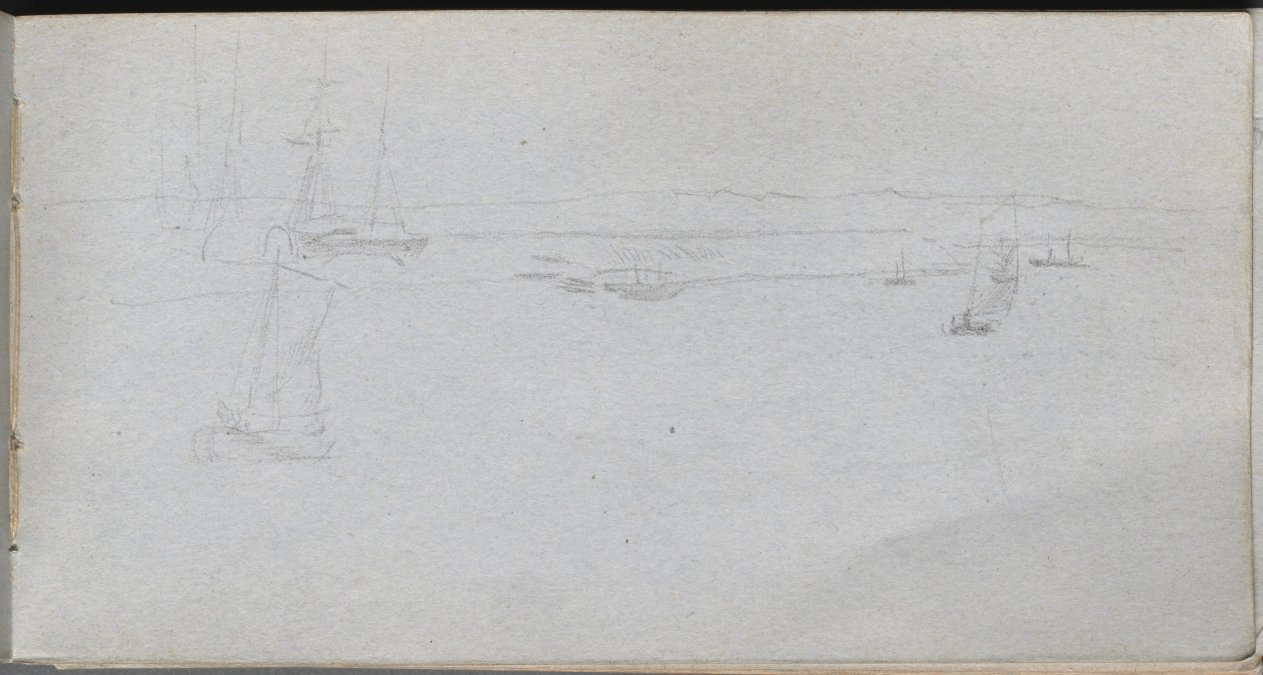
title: Sketchbook, page 94: Seascape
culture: France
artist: Ernest Meissonier (French, 1815–1891)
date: c. 1860s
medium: graphite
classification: Bound Volume